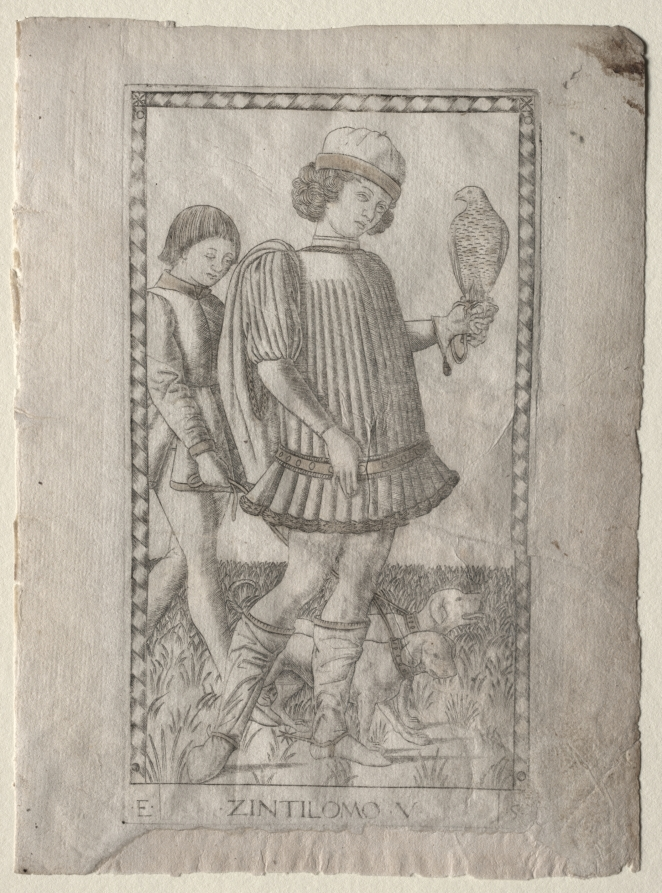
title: Gentleman (from the Tarocchi series E: Conditions of Man, #5)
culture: Italy, Ferrara, 15th century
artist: Master of the E-Series Tarocchi (Italian, active 1460s)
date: c. 1465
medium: engraving, hand-colored with gold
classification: Print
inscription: Lettered below the image of Zintilomo (The Gentleman): ·E· / ·ZINTILOMO·V· / ·5·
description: This engraving is part of the Tarocchi group marked with the letter E and named Conditions of Man. This series outlines the social and hierarchical order of ten characters (Beggar, Servant, Artisan, Merchant, Gentleman, Knight, Doge King, Emperor, and Pope), starting from the lower grade and ending with the most important one. Here, Zintilomo (The Gentleman) is shown as a full-length male figure, turned to the right. The elegantly dressed youth is holding up a falcon in his gloved left hand. A servant follows him at his back, and walks two dogs on a leash.